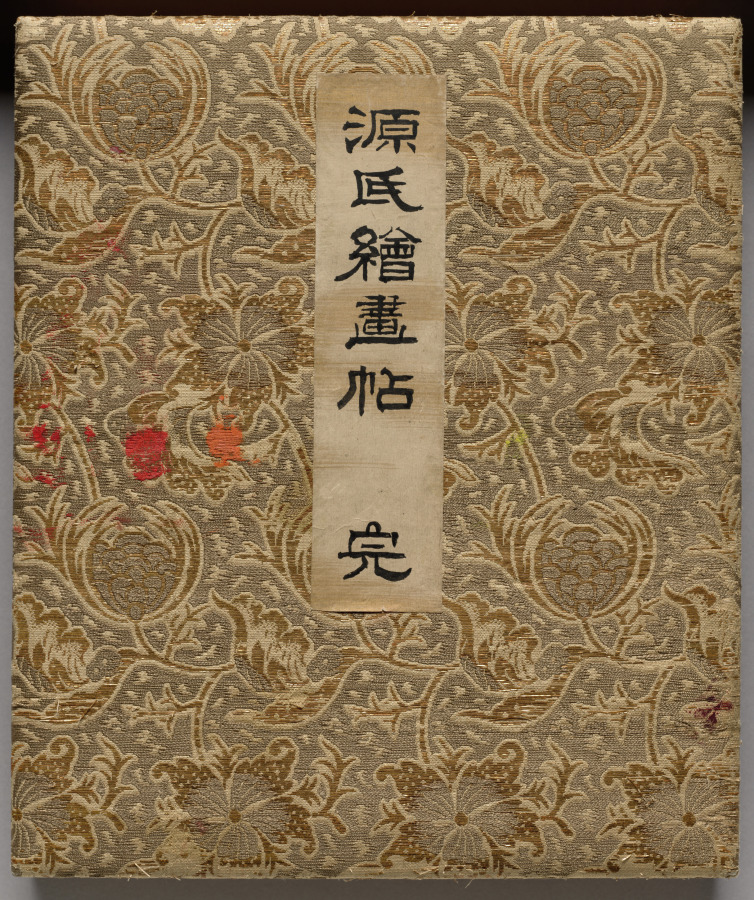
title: Album of Illustrations for the Tale of Genji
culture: Japan, Edo period (1615–1868)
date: 1600s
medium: Double-sided accordion-style album of 17 leaves; ink, light color, and gold on paper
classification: Bound Volume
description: This album contains illustrations for the classic literary work the Tale of Genji, authored in the 1000s by Murasaki Shikibu, an aristocrat of the Heian period (794–1185) court. The scenes are painted in the “white drawing” (hakubyō) mode, in which a fine ink line is used to depict figures and spaces with great subtlety, punctuated only occasionally by traces of red pigment for a character’s lips, a detail of a garment, or a decorative element. These two scenes illustrate episodes from the chapters “Thin Veil of Cloud” (Usugumo) and “Barrier Gate” (Sekiya).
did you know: The illustrations are identified by chapter title in cartouches to the upper right of the paintings.